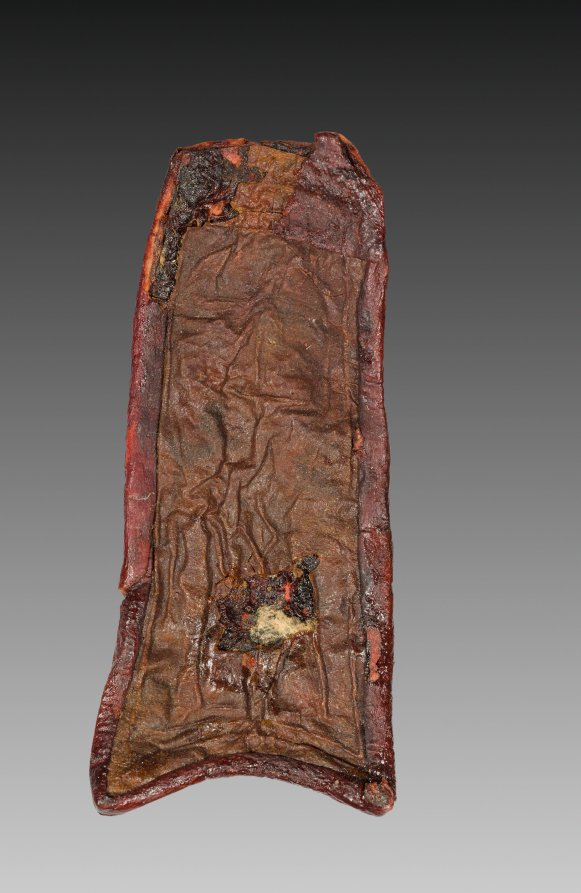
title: Tab from Mummy Band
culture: Egypt, Third Intermediate (1069–715 BCE), Dynasty 22, reign of Osorkon I (992–887 BCE)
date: 945–715 BCE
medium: stained leather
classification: Funerary Equipment